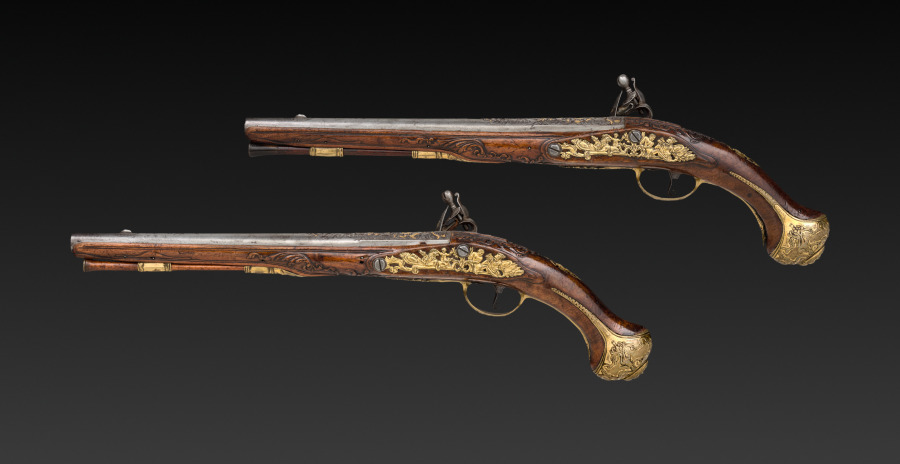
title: Pair of Flintlock Pistols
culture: Franco-Flemish, Liège, early 18th century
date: early 1700s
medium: steel with gold inlay, gilt-brass mounts; walnut burl stock; chiseled high-relief decoration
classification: Arms and Armor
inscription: G. MASSIN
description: Works of exquisite craftsmanship, this pair of pistols, on view in the museum’s armor court, feature an array of decorative elements, including carved walnut, gold inlay, and chiseled, engraved, and gilded figural designs. The barrel is signed G. MASSIN, the name of a gunsmith working in eastern France or French-speaking Flanders, possibly the city of Liège.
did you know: The flintlock ignition system was developed in the 1600s and remained the dominant system until the early 1800s.